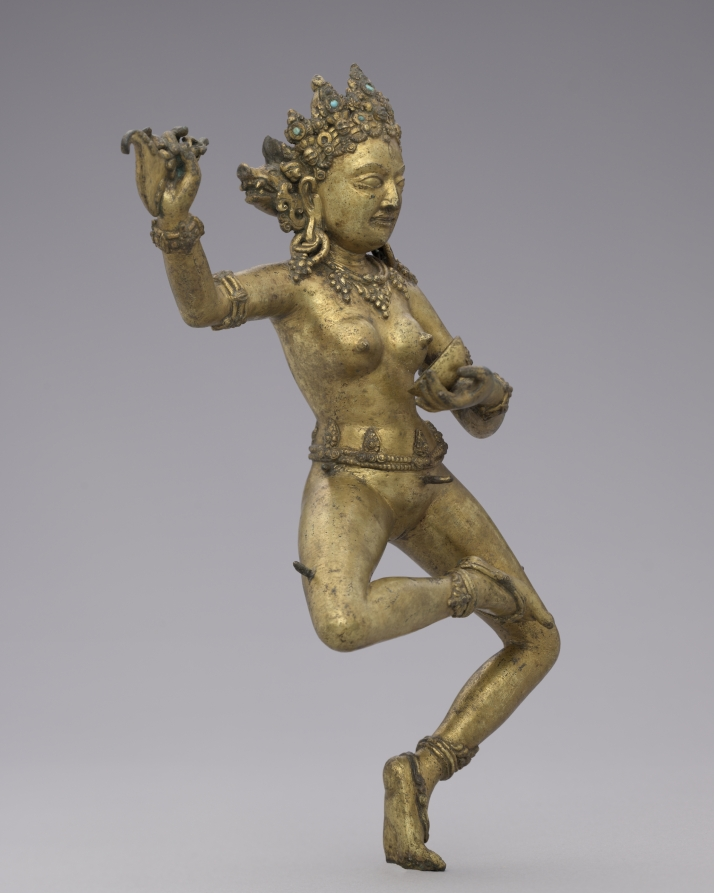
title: Vajravarahi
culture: Tibet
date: 1300s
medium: gilt bronze with turquoise inlay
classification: Sculpture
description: Vajravarahi is the tantric Buddhist counterpart to the Hindu mother goddess Varahi, identifiable by the boar head emerging above her right ear. She is a female enlightened being who emanated from the Buddhist Goddess of Perfect Wisdom. Enlightened beings transcend gender distinctions, and they can emanate as either male or female. The lithe figure dances while carrying a skull cup in her left hand. Raised up in her right hand is a ritual flaying knife with a handle in the shape of a halfvajra, used for skinning the metaphorical beast of uncontrolled passions. The pegs cast into her lower body were for holding a bone skirt.